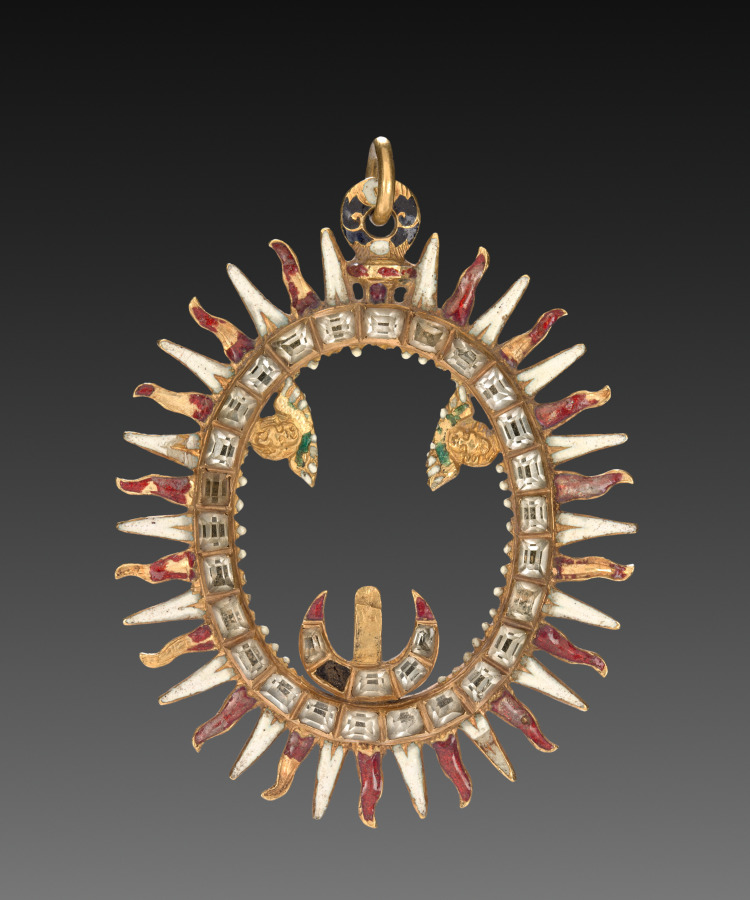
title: Pendant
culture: Spain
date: 1500s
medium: gold and enamel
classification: Jewelry